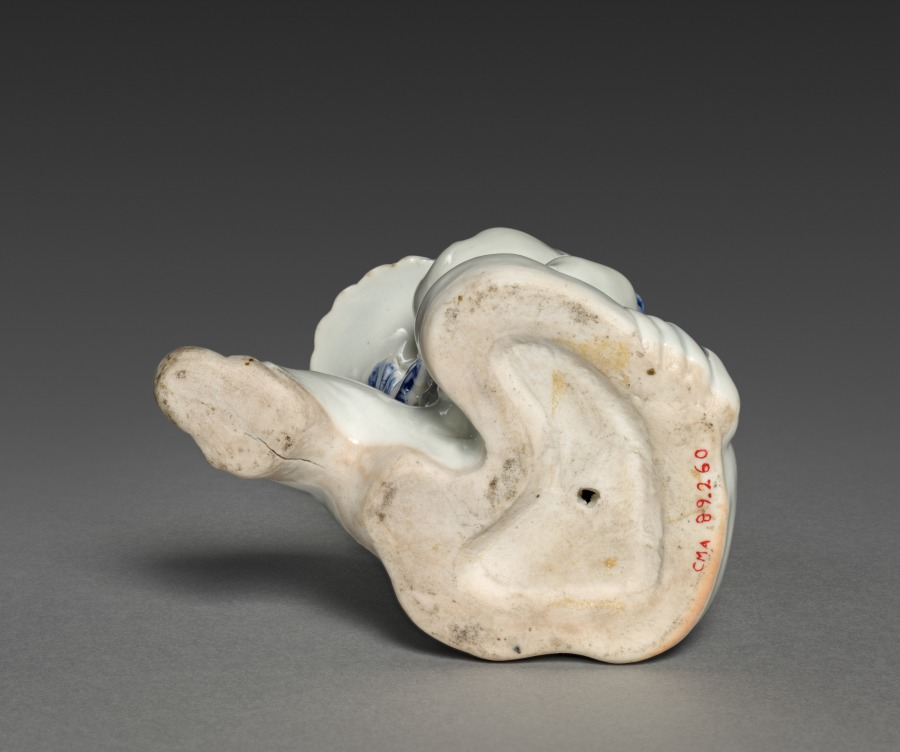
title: Kneeling Boy Holding a Vase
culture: Japan, Edo period (1615–1868)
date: 1700s-1800s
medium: porcelain, molded and carved, with underglaze blue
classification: Ceramic